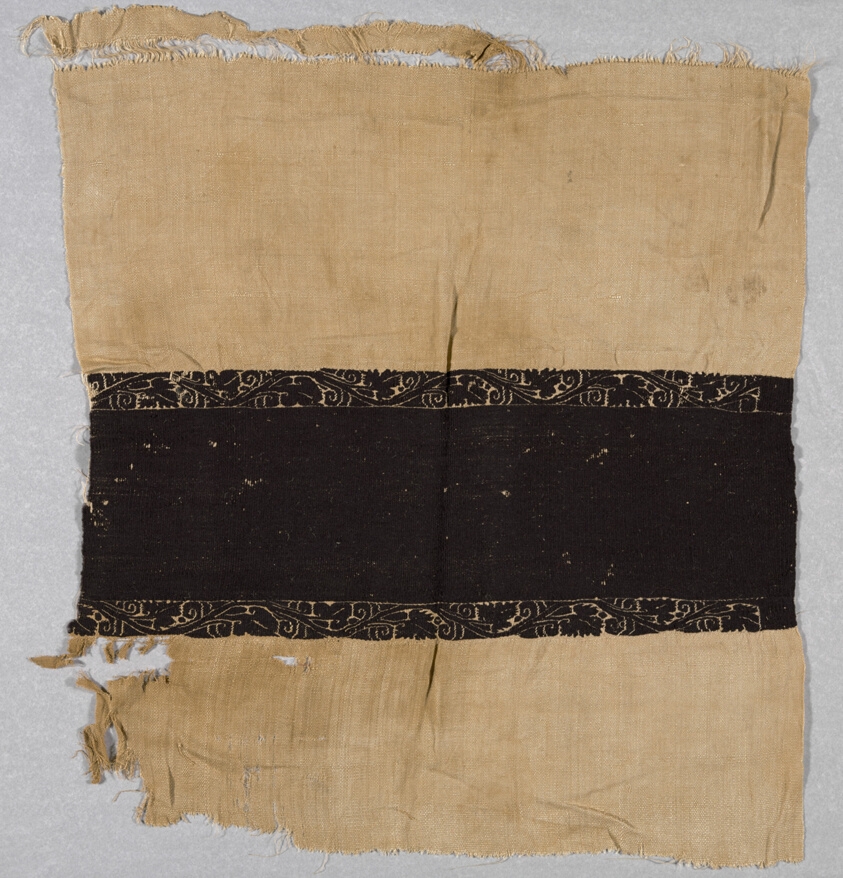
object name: Textile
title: Fragment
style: roman period (egyptian), coptic (period)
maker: Egypt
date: Roman period (30 B.C.– 641 A.D.)/Arab period (641–969)/Fatimid period (969–1171), 3rd/ 10th century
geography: Egypt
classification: textile; weaving